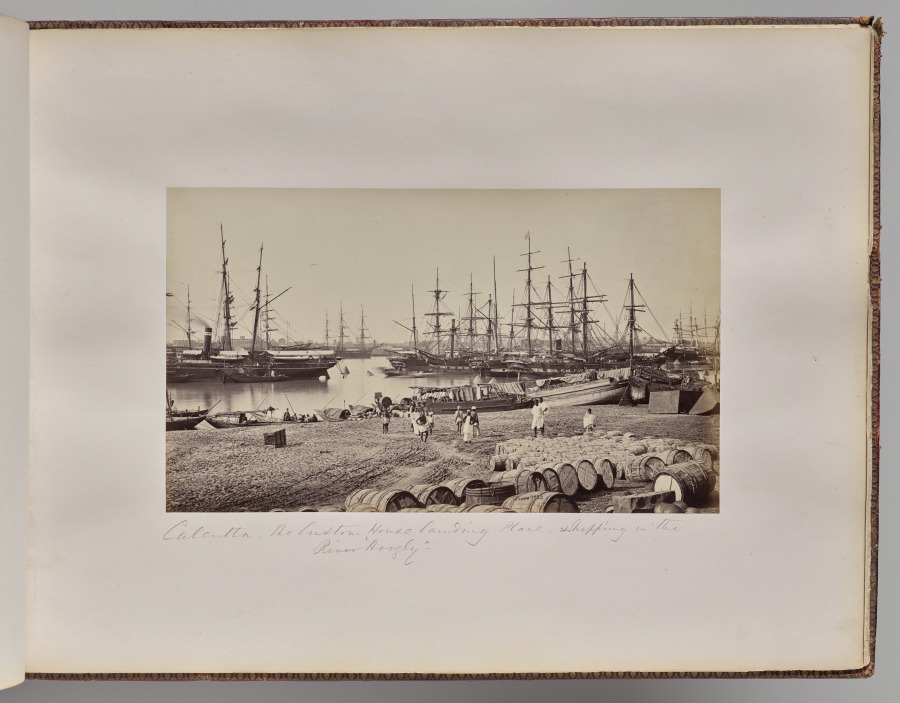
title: Calcutta. The Custom House Landing Place. Shipping in the River Hoogly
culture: England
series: Photographs of Northern India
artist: Samuel Bourne (British, 1834–1912)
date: 1863–70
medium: albumen print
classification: Photograph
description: The 50 images in this album, all taken in the 1860s, move from the hill towns of the Himalayas down to cities including Lahore (now in Pakistan), Delhi, Lucknow, Agra, Benares (now Varansi), and Calcutta (now Kolkata). Architectural studies of major monuments offer valuable historical records of what sites such as the Taj Mahal and the imperial mosque of the Mughal emperors in Delhi looked like before 20th-century restorations.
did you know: Samuel Bourne, the author of most the images in this album, was a banker in England before he moved to India to become a professional photographer.